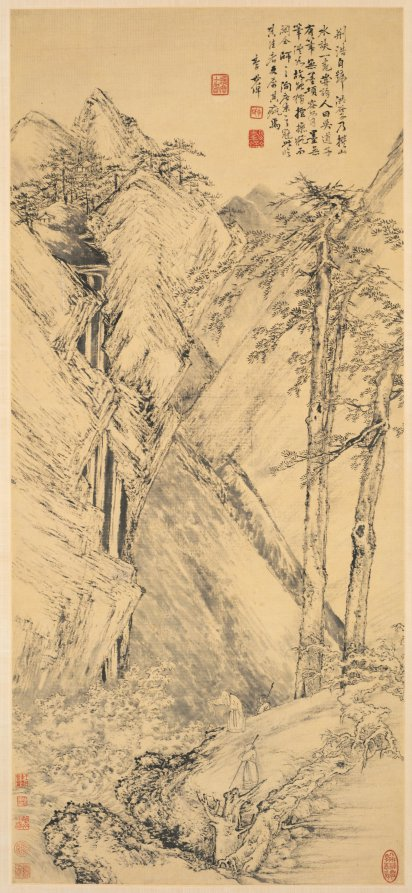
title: Landscape after Jing Hao and Guan Tong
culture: China, Qing dynasty (1644-1911)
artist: Li Shizhuo (Chinese, c. 1690–1770)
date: c. 1690–1770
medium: hanging scroll; ink on paper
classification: Painting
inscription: 荆浩自號洪谷子，乃撰山水訣一卷。嘗誇人曰：吳道子有筆無墨，項容有墨無筆。洪谷故能獨擅操縱，而關仝師之。絢唐末之冠。此臨其佳者而更屛其疵焉。李世倬 [印]卓氏; 穀齋; 蝯詹上_ [印, 右下]几研精嚴見性情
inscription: 5 additional seals: 1 of C. C. Wang 王季遷 (1907–2003); 4 unidentified.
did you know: Three figures on the lower slope excitedly watch the waves and foam rising beneath the waterfall.